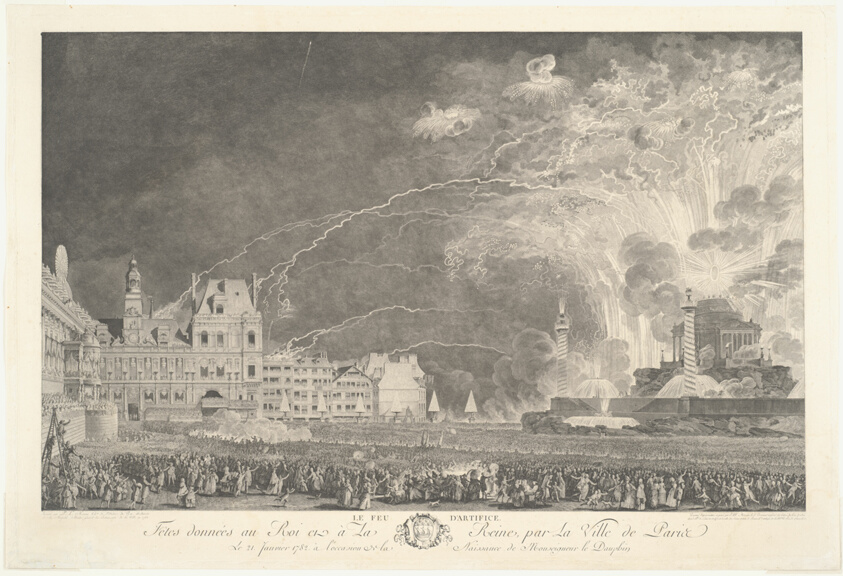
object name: Print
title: The Fireworks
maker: Jean Michel Moreau (French, 1741-1814)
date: January 21, 1782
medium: Etching and engraving in black on cream wove paper, laid down on cream wove paper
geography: France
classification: etching; paper; print; prints and drawing